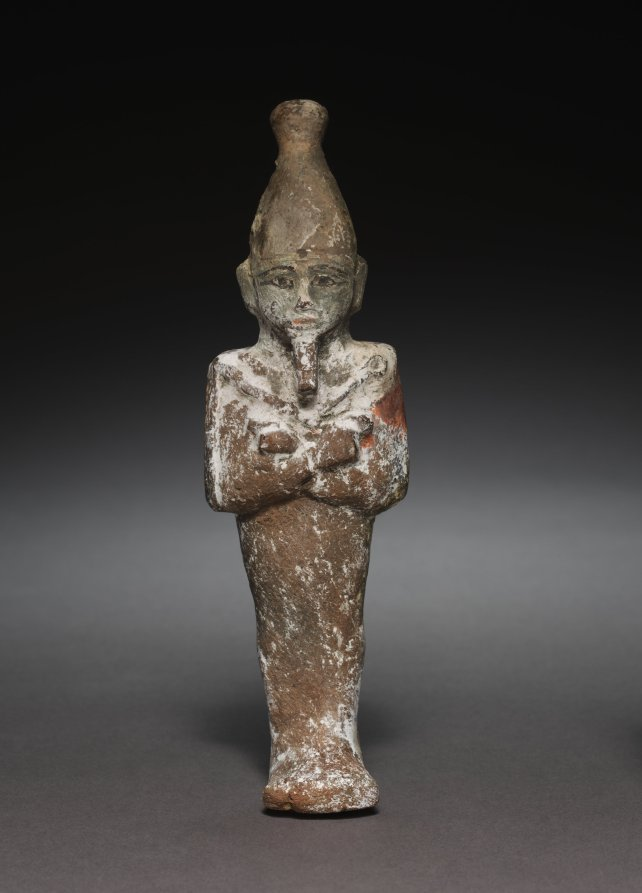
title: Statuette of Osiris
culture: Egypt, New Kingdom (1540–1069 BCE), Dynasties 19–20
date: 1295–1069 BCE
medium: painted terracotta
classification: Funerary Equipment